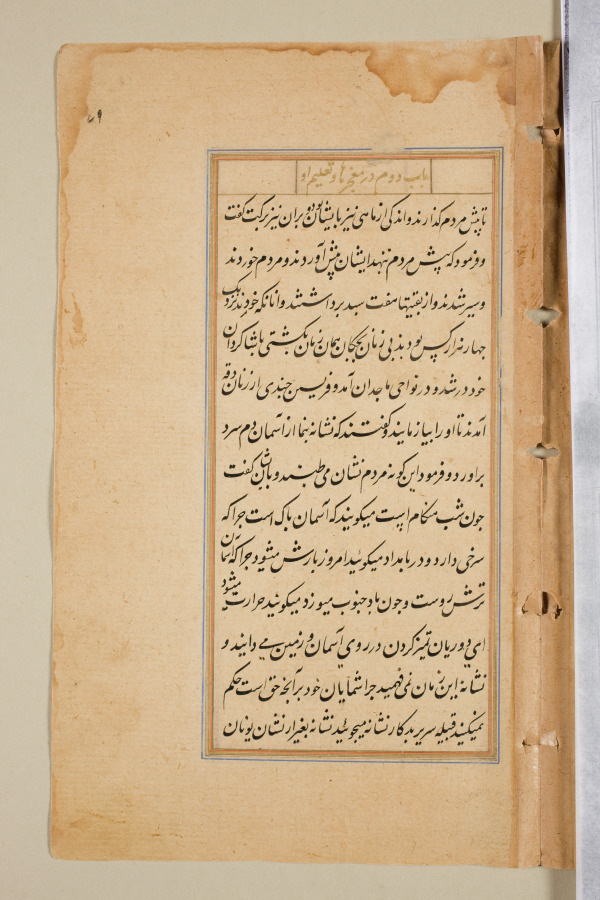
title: Text page from a Mirror of Holiness (Mir’at al-quds) of Father Jerome Xavier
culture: Mughal India, Allahabad, made for Prince Salim (1569–1627)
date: 1602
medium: Ink and gold on paper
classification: Manuscript